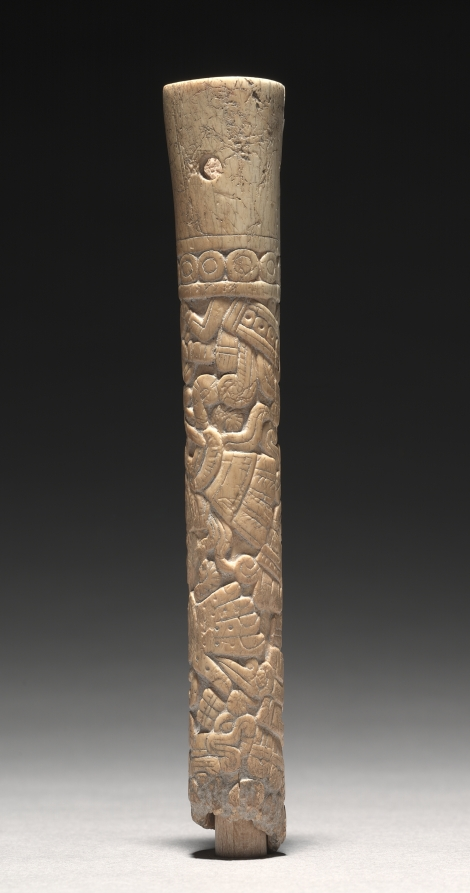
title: Carved Tube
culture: Mexico, Oaxaca, Mixtec, 13th-16th century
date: c. 1200–1519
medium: bone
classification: Jewelry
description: Carved in spiral registers, the ornamentation on this bone tube resembles Mixtec painting, both in codices (screenfold books) and architectural murals.